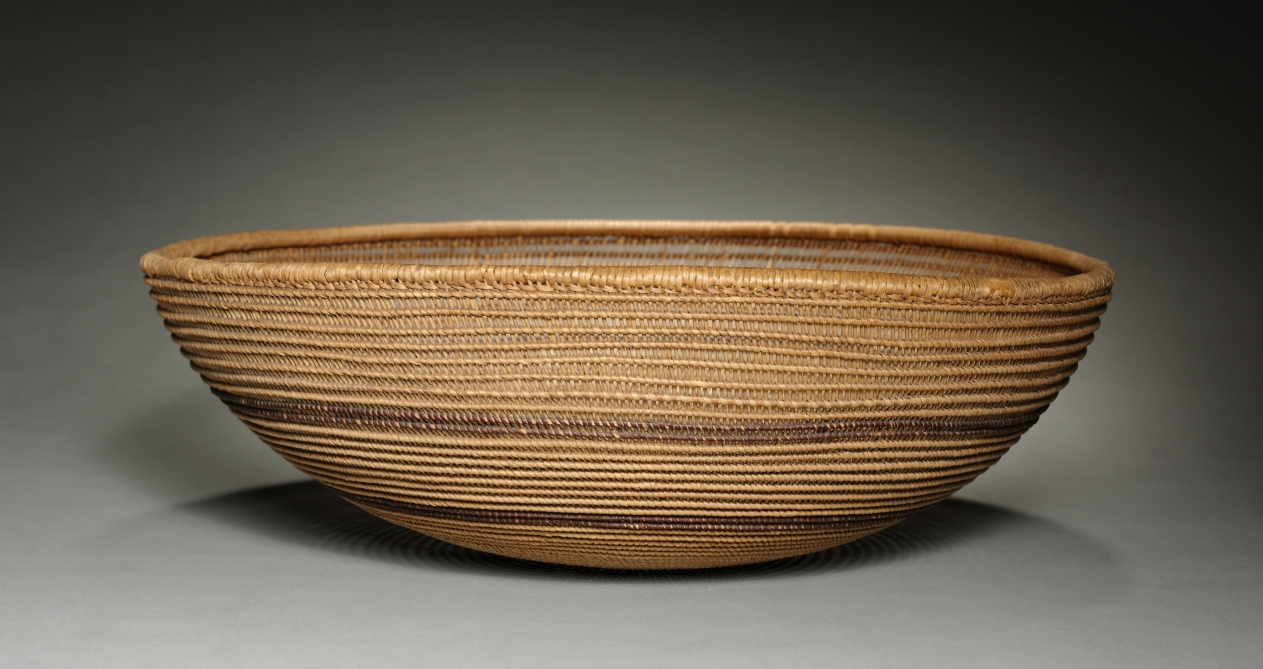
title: Tray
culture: California, Pomo, late 19th- early 20th century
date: 1895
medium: plain twine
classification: Basketry